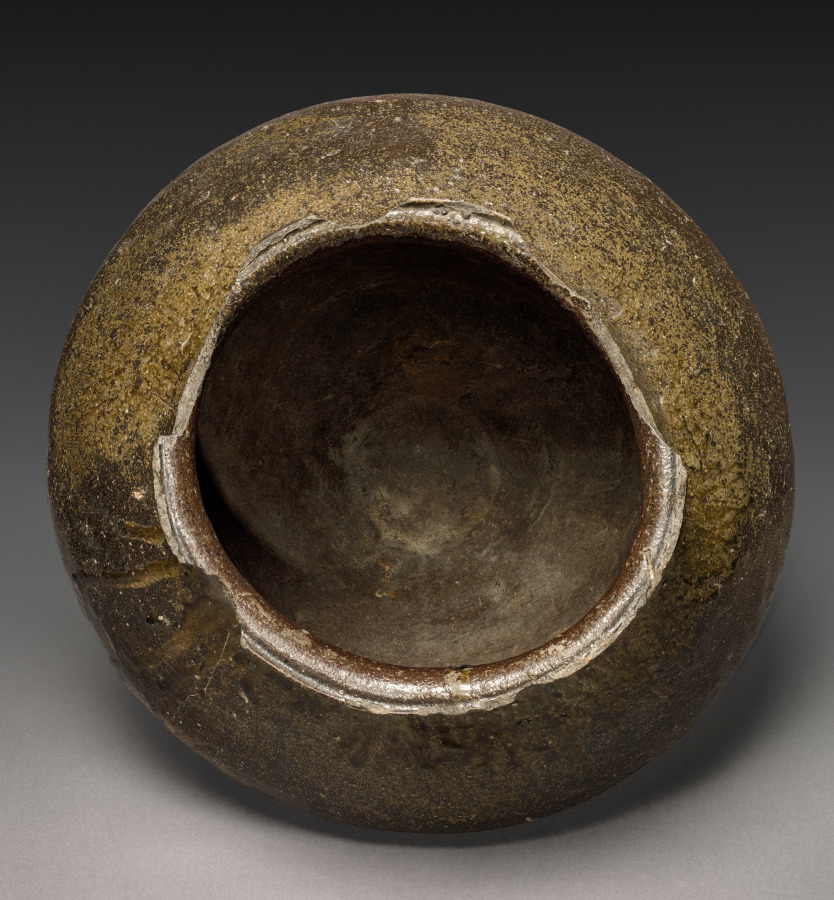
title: Storage Jar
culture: Japan, Nanbokuchō period (1336–92)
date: 1350–99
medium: Stoneware with natural ash glaze and impressed designs (Tokoname ware)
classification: Ceramic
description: This storage jar was made by piling coils of clay atop one another, smoothing the inner and outer surfaces, and allowing the clay to dry before adding another section of the form. The wide rim and mouth were then added using a potter’s wheel. Because of its small base, the vessel could stand safely on a narrow step on the steep slope of a rising kiln floor. Such kilns were built into the side of a hill and used wood for firing. The natural ash glazes took about a week to 10 days to form.